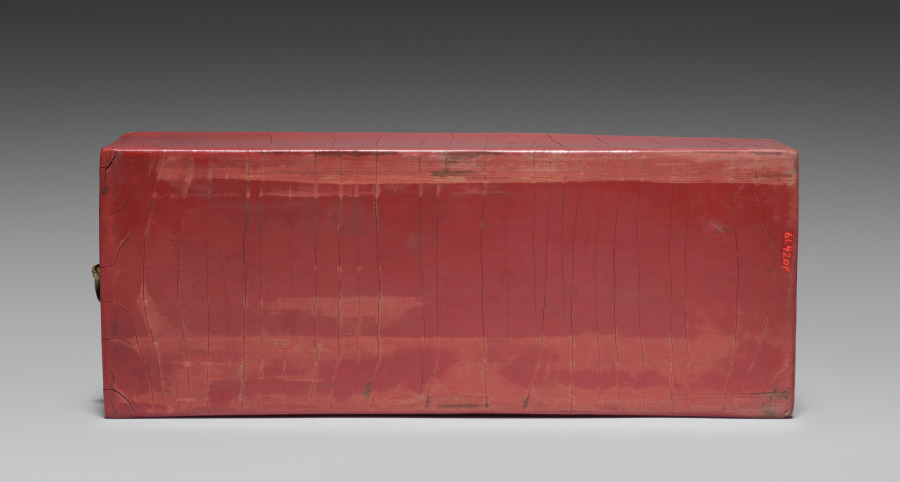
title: Drawer for a Tihong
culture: China, Ming dynasty (1368-1644), Wanli reign (1572-1620)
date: 1585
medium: carved cinnabar lacquer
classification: Lacquer